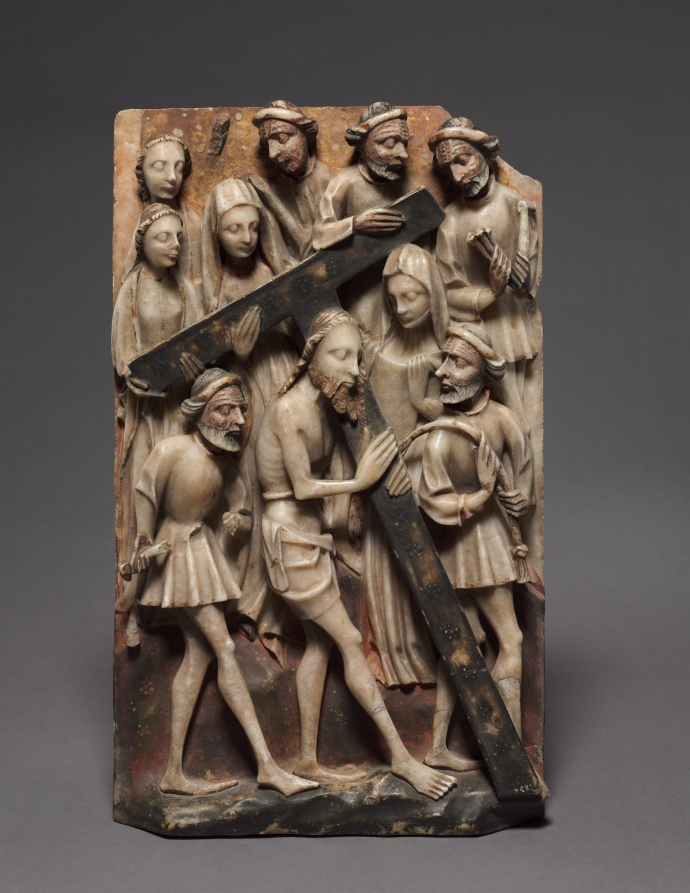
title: Christ Carrying the Cross (Panel from an Altarpiece)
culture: England, Nottingham, 15th century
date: 1400s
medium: painted and gilded alabaster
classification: Sculpture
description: This panel, most likely one of five narrative scenes representing the Passion of Christ, comes from a now dismembered altarpiece. The central panel was undoubtedly a scene of the Crucifixion. Such carvings in alabaster were frequently painted in vibrant colors with added gilding. The flesh areas of the figures were often left unpainted, with the exception of villains and executioners whose faces were "blackened," as in this example, a convention that may derive from the medieval stage. English alabaster sculptures were in high demand throughout Europe during the 1300s and 1400s, and exported to Portugal, Spain, Scandinavia, Iceland, and other countries. A soft stone suitable only for interior sculpture, English alabaster was highly prized for its creamy translucency. Of the English quarries, those near Nottingham in the Midlands were the most active.